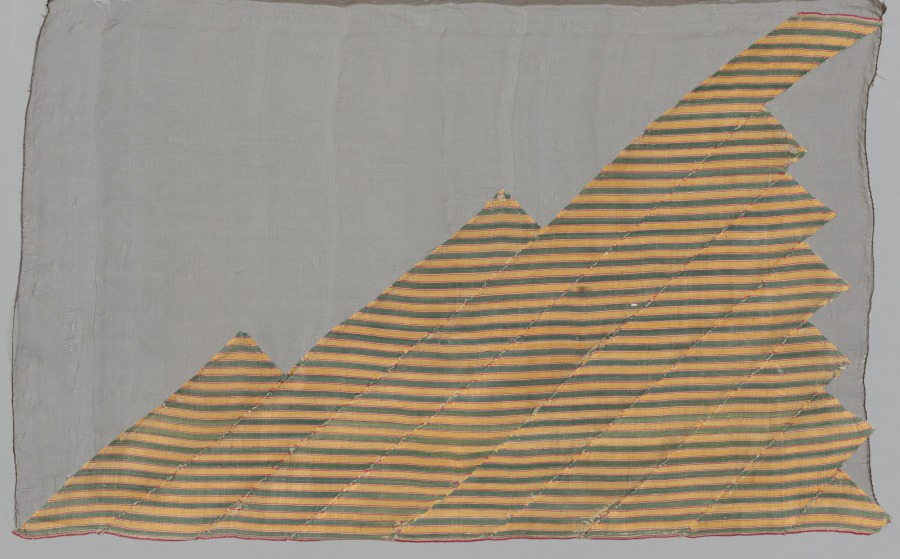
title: Fragment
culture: India, 17th-18th century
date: 1600s - 1700s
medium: satin weave; silk and cotton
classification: Textile